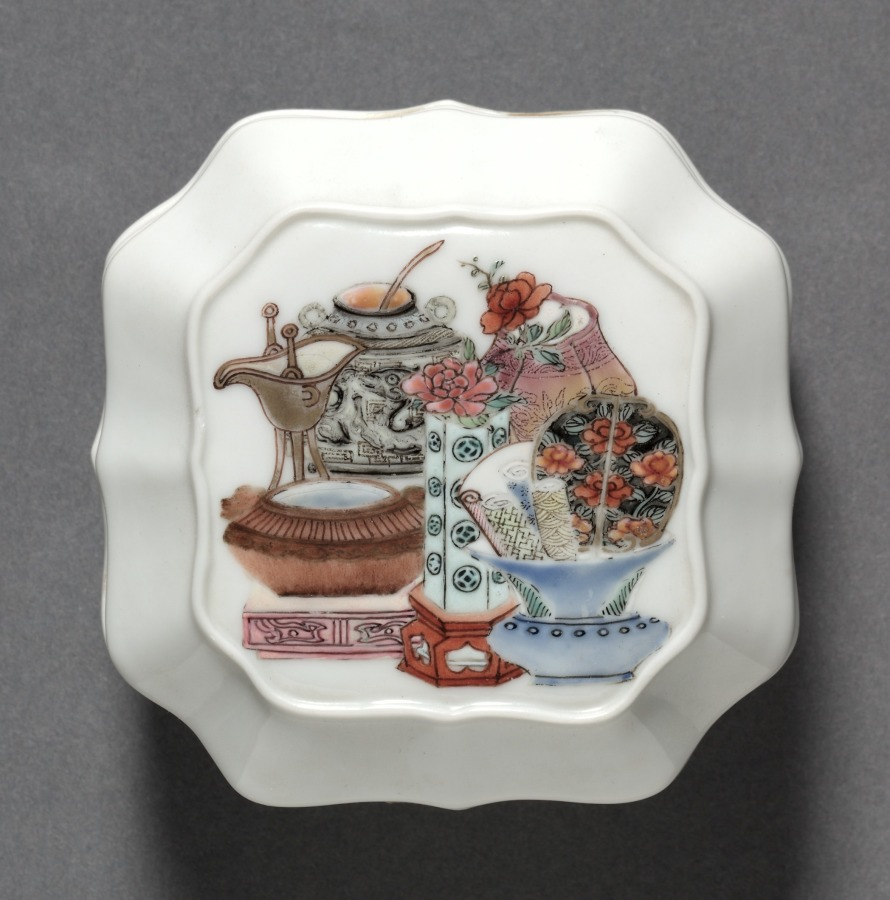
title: Square Covered Box with Hundred Antiquities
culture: China, Jiangxi Province, Jingdezhen kilns, Qing dynasty (1644–1911), Yongzheng mark and reign (1723–35)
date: 1723–35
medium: porcelain with famille rose overglaze enamel decoration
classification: Ceramic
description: The painted decoration in this box cover provides an interesting image of the antiquities and objects being collected in the Chinese scholar’s desk—all of which are emblems of taste, status, and affluence. Connoisseurship, art cataloguing, art historical study, and elegant social gatherings developed alongside art collecting as part of the Chinese literati culture.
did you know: An auspicious lingzhi mushroom was painted on the base.